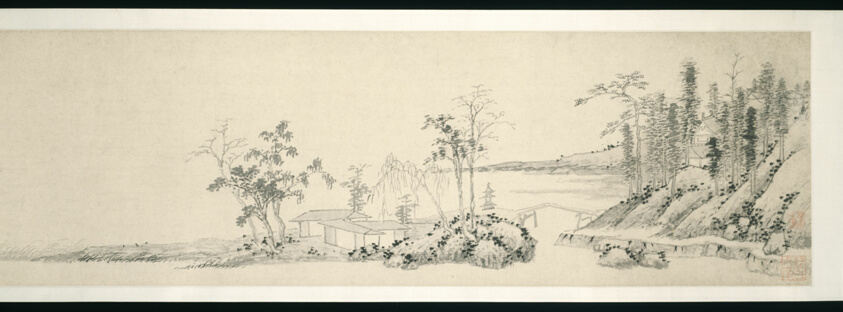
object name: Painting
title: Return to Stone Lake 石湖歸棹圖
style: Chinese (culture or style)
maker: Shen Zhou, 沈周; Chinese, 1427-1509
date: Ming dynasty (1368–1644), dated 1466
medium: Handscroll; ink on paper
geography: China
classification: handscroll; painting; asian art